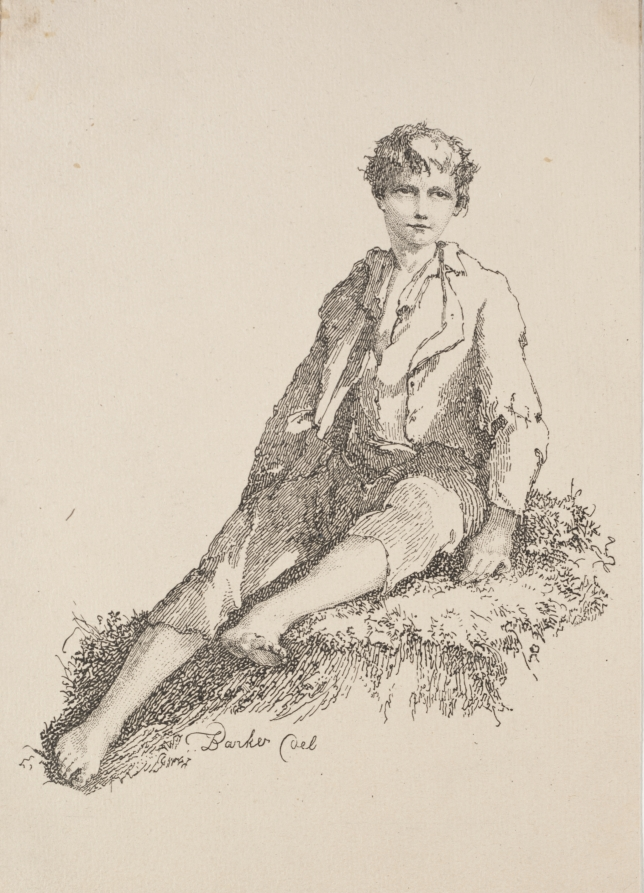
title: Specimens of Polyautography: Boy Seated on a Grassy Bank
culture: England, early 19th Century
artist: Thomas Barker (British, 1769–1847)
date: 1803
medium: lithograph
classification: Print